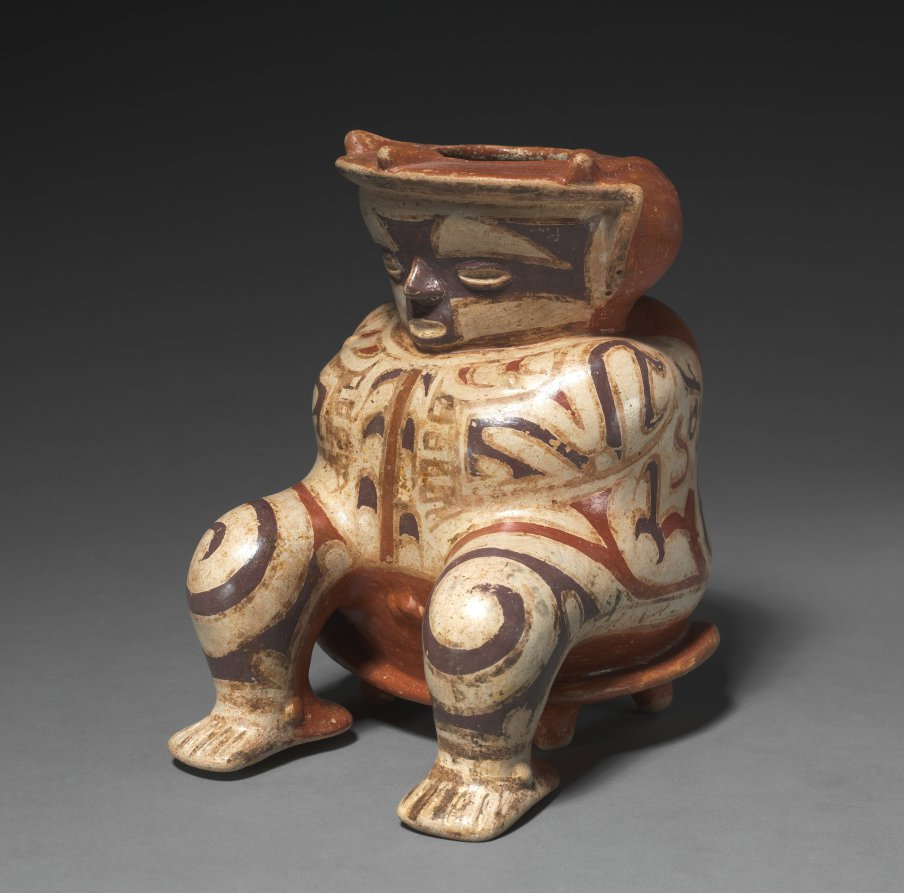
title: Hunchback Seated on a Stool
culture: Central Panama, Conte Style, c. 600-800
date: c. 600–800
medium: earthenware with colored slips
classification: Ceramic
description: The meanings of hunchbacks is not well-studied in Panamanian art. But to the north, in Mexico and Guatemala, such physical anomalies marked individuals of great spiritual power. A few of this figure’s features suggest that hunchbacks held similar status in Panama: The figure sits upon a four-legged stool, a symbol of authority, and the mythic creatures painted on each side may connect the figure to the supernatural realm.